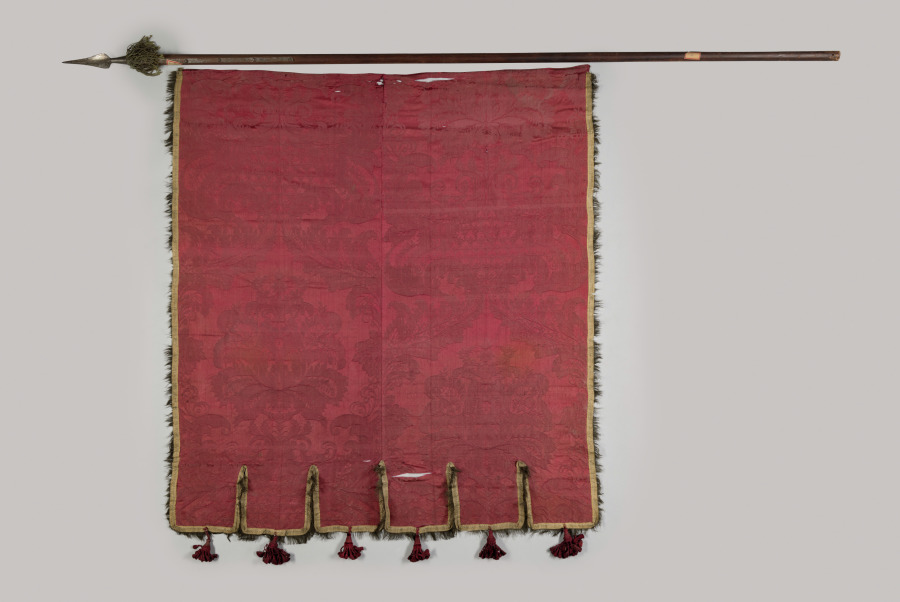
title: Banner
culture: Spain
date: 1700s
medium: crimson silk brocade; scalloped border with fringe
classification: Textile